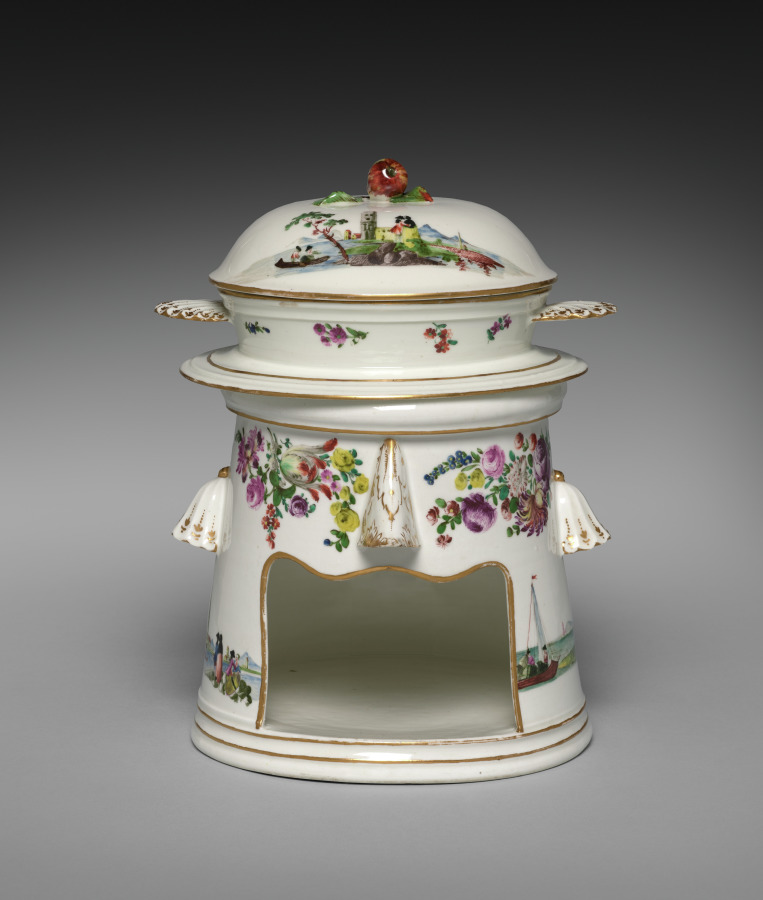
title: Food Warmer (Veilleuse)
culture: Germany, Nymphenburg, 18th century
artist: Nymphenburg Porcelain Factory (German, founded 1747)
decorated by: probably by Georg Christoph Lindemann (German)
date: c. 1758–1760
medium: porcelain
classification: Ceramic